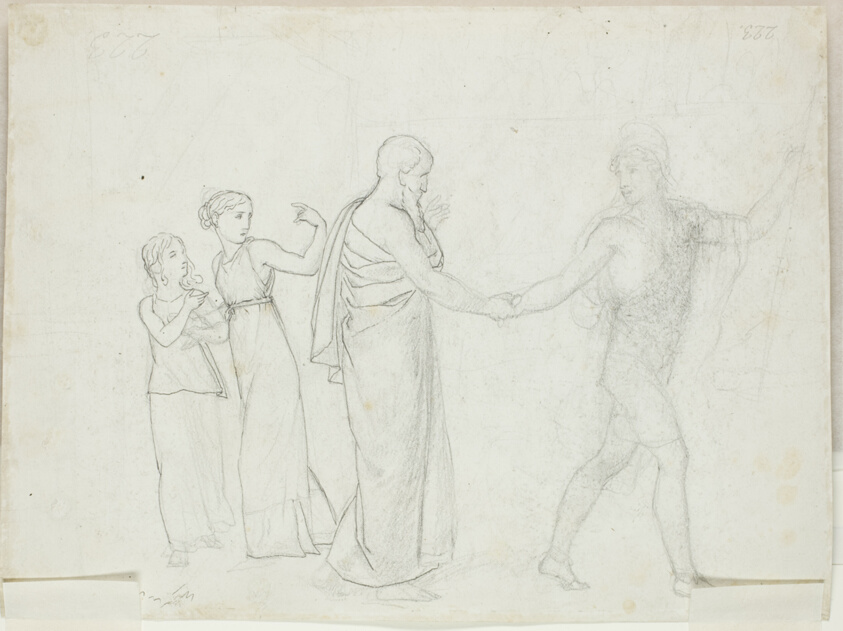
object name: Drawing and Watercolor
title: Relais, Avenue des Champs-Élysées, Paris (recto); Scene from the Life of Odysseus (verso)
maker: Christoffer Wilhelm Eckersberg (Danish, 1783-1853)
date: 1812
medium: Pen and black ink, with brush and gray and brown washes, over graphite (recto); graphite and pen and black ink (verso) on off-white wove paper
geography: Denmark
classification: pen and ink drawings; prints and drawing; paper